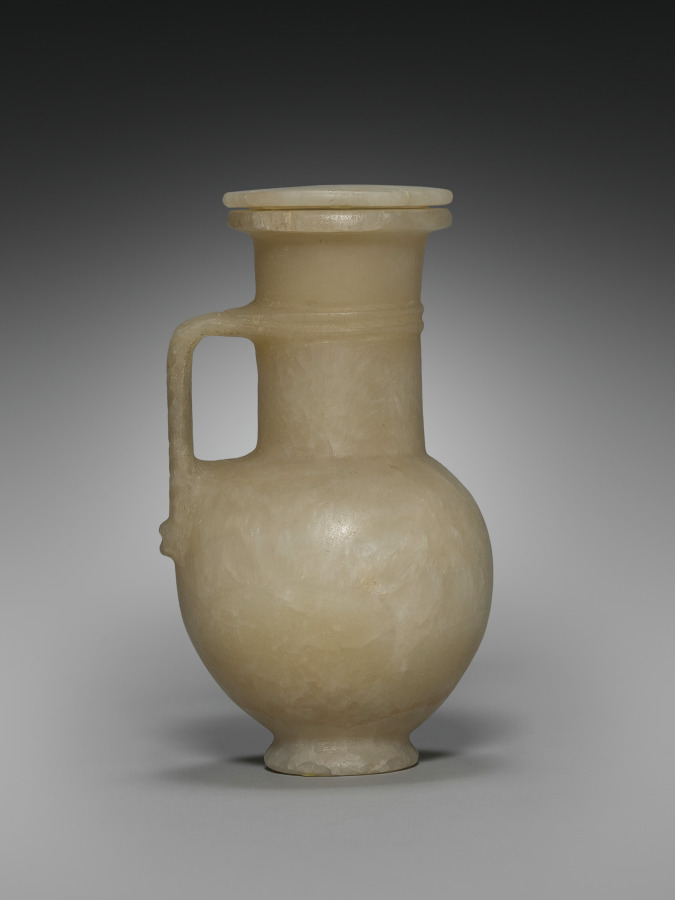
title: Long-Necked Flask with Strap Handle and Lid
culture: Egypt, New Kingdom (1540–1069 BCE), Dynasty 18, reign of Tuthmosis III (1479–1425 BCE)–reign of Amenhotep III (1390–1352 BCE)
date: 1401–1353 BCE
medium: travertine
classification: Vessels